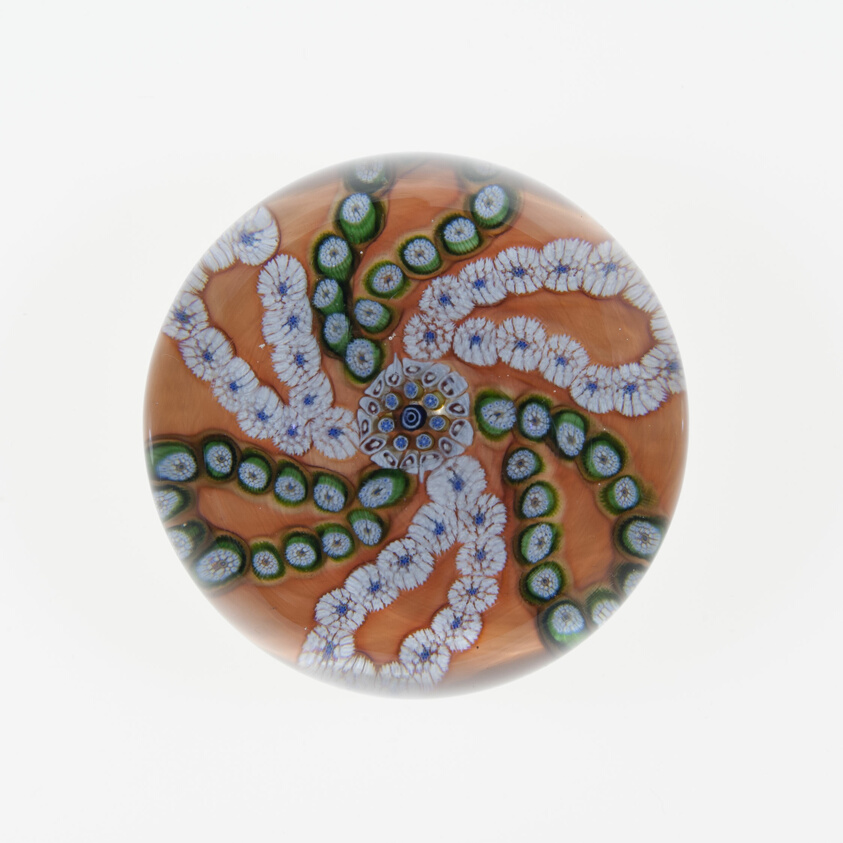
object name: Glass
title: Paperweight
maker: Saint-Louis Glassworks (Cristalleries de Saint-Louis); Lorraine, France, founded 1586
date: c. 1845/60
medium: Glass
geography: Saint-Louis-lès-Bitche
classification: paperweight; glass